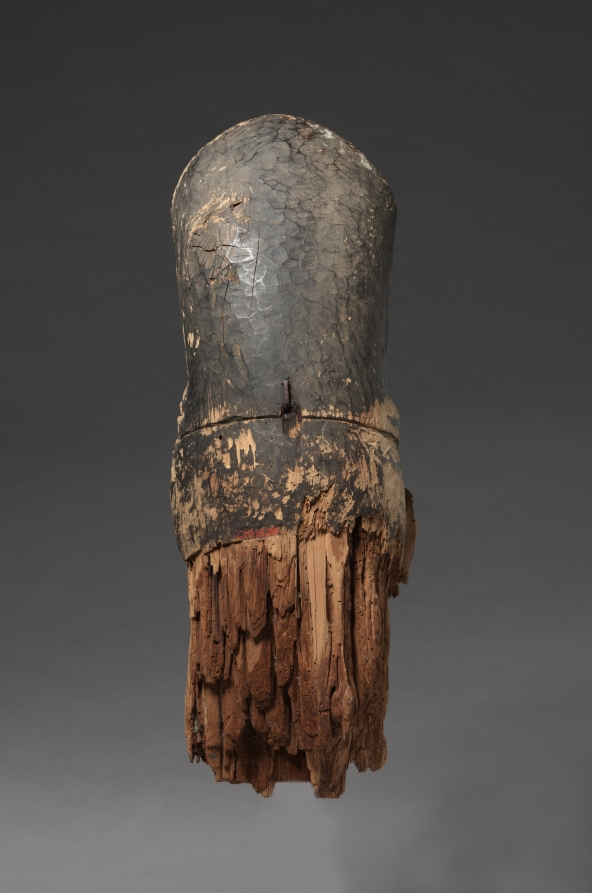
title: Head of a Male Shinto Deity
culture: Japan, Heian period (794–1185)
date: 900s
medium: wood with lacquer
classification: Sculpture